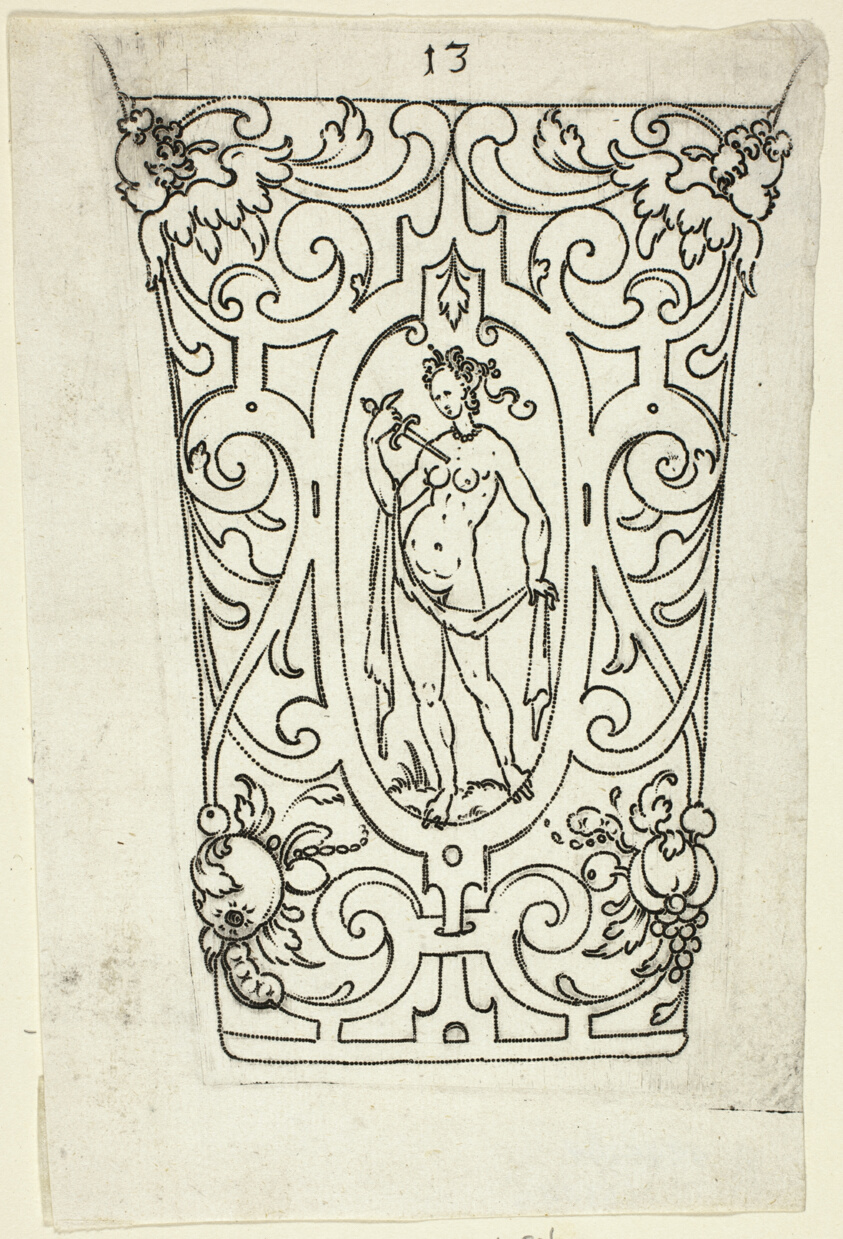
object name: Print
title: Plate 13, from XX Stuck zum (ornamental designs for goblets and beakers)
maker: Master A.P. (German, active early 17th century)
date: 1601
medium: Punch engraving in black on ivory laid paper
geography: Germany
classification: print; engraving; prints and drawing